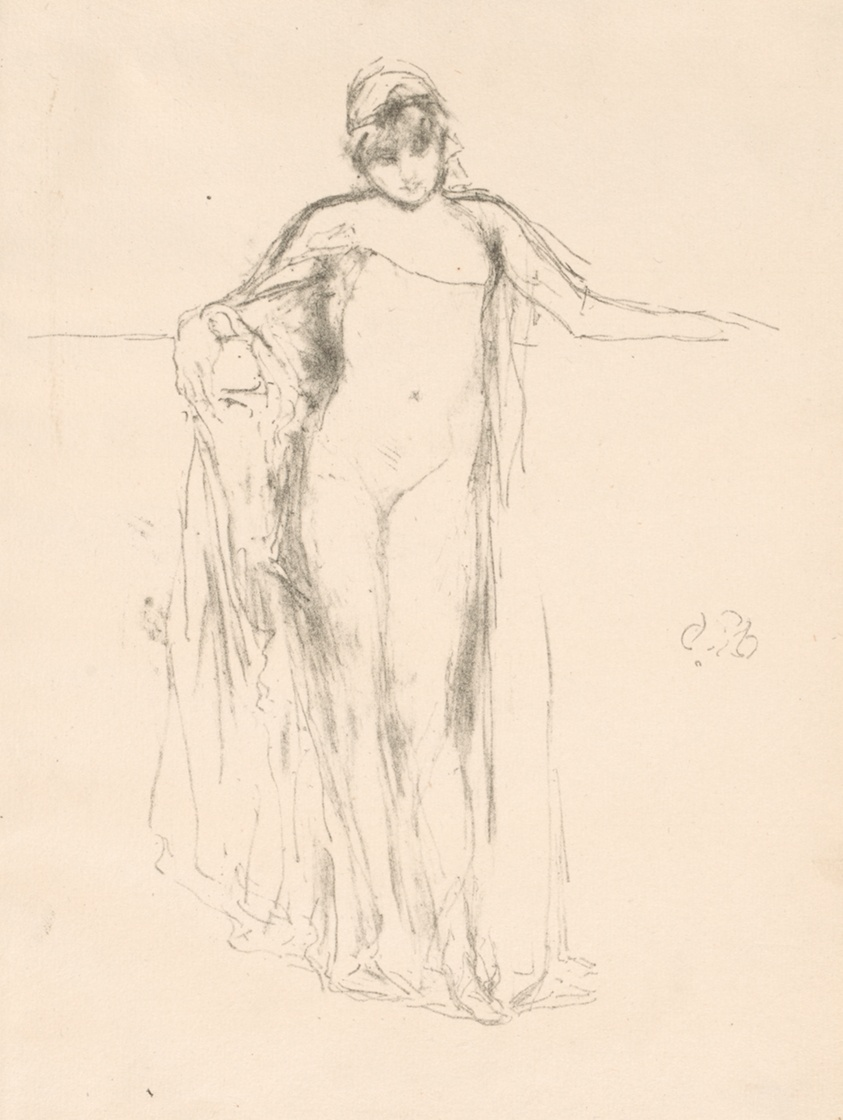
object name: Print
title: Draped Model, Standing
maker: James McNeill Whistler (American, 1834-1903)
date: 1893, printed posthumously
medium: Lithograph, in black ink, with stumping, on cream laid paper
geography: United States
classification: lithograph; print; prints and drawing; paper